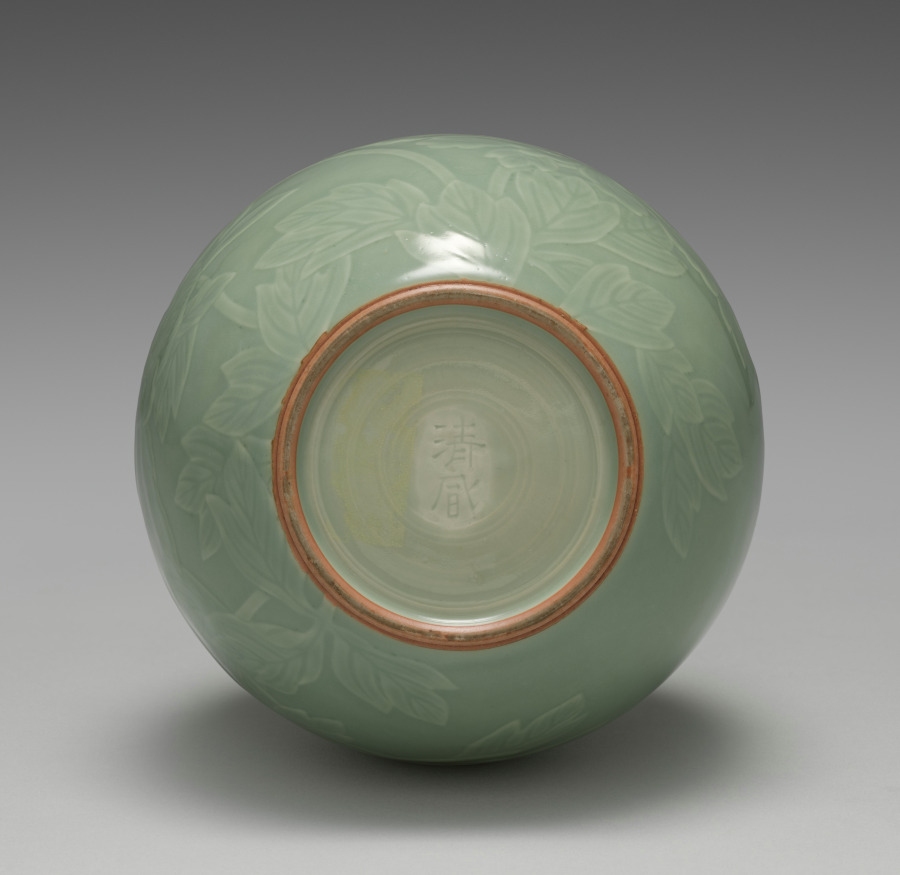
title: Water Container with Peonies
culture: Japan, Meiji period (1868–1912)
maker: Seifū Yohei III (Japanese, 1851–1914)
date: 1900–1914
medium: Porcelain with molded and carved design, green glaze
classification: Ceramic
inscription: 清風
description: This ceramic is an especially accomplished example of Yohei III’s combination of an all-over translucent colored glaze with molded and carved designs. It features the peony as its primary motif. The water container, or mizusashi, has a green glaze, and its design takes into consideration the rounded shape and the seated position of the host and guests. It begins low on the body with a flower just beginning to open and continues with another flower a bit higher up, with its petals fully extended and beginning to open outward. It finishes with a flower in full bloom, petals and leaves unfurled and spread outward from the center, now occupying almost the entire surface. The water container once belonged to the Hosokawa family, whose go-between corresponded with Yohei IV about the piece. Yohei IV thanked them for their payment and requested that despite his father’s death in the previous year, they continue to favor the studio with their orders. The letter and its envelope, as well as an auction tag, remain with the object.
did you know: Yohei III often made chanoyu pieces for select clients, as documented by letters still preserved with this water container, or mizusashi.